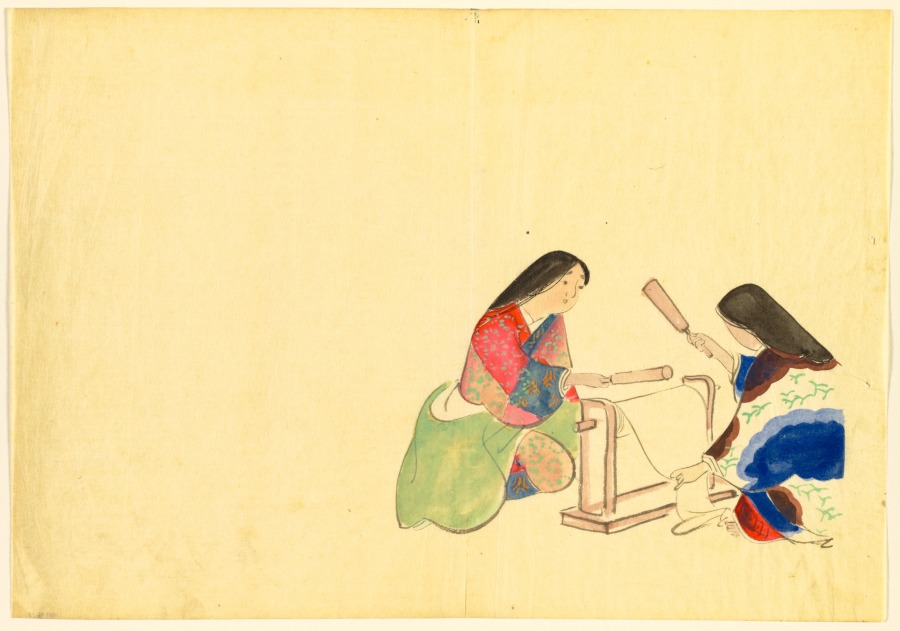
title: Flowers of a Hundred Worlds (Momoyogusa): Fulling Silk (Uchiginu)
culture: Japan, Meiji period (1868–1912)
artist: Kamisaka Sekka (Japanese, 1866–1942)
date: 1909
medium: ink and color on paper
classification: Drawing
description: Kamisaka Sekka made preparatory drawings for his Flowers of a Hundred Worlds series on tracing paper with ink and color. The freehand sketches are much looser than the finished, printed compositions.